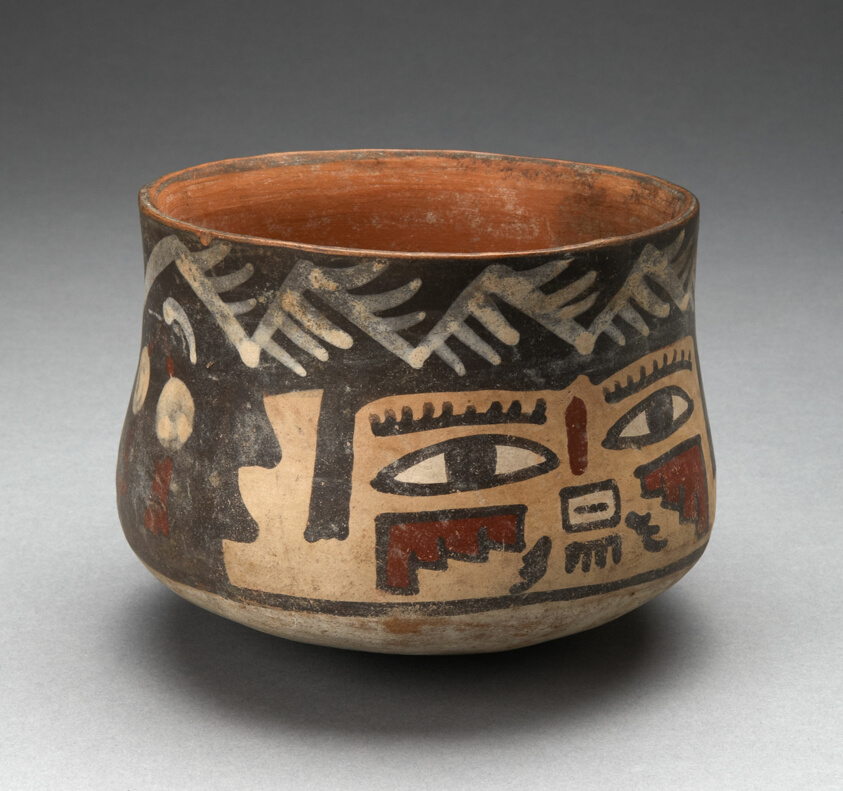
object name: Vessel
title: Short Beaker Depicting Human Head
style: nazca, early intermediate period, Pre-Columbian, americas, Arts of the Americas, andean, andes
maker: Nazca; South coast, Peru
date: 180 BCE–500 CE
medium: Ceramic and pigment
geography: Nazca Valley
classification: earthenware; art of the americas; ceramics; vessel